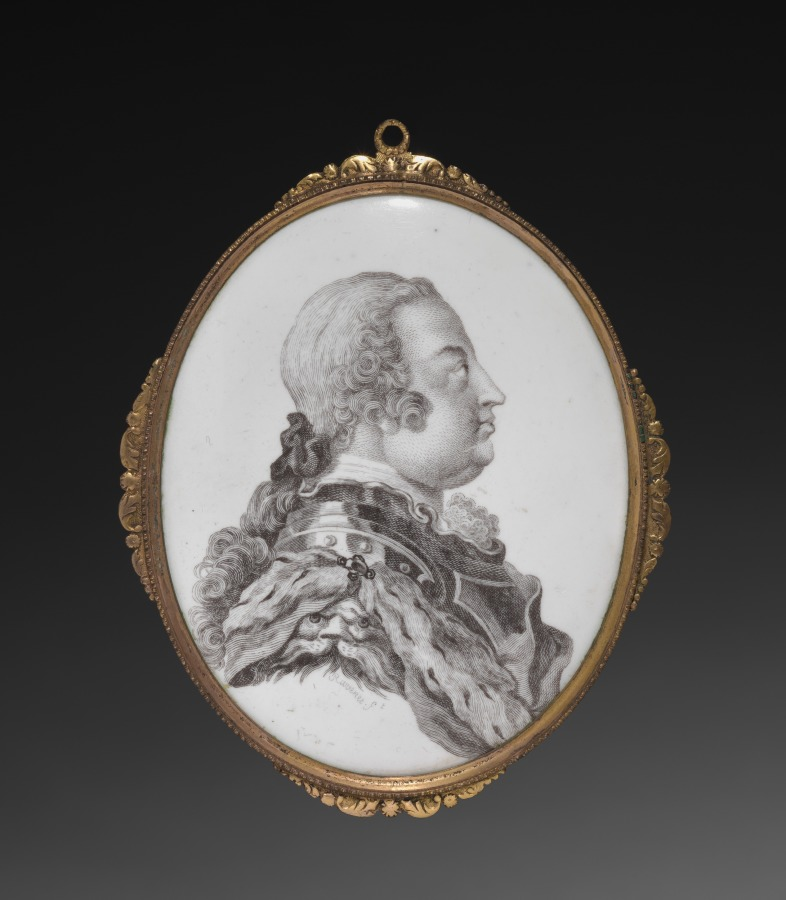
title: Portrait Miniature of Prince William Augustus, Duke of Cumberland (1721-1765)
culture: England, Battersea, 18th century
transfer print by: Simon François Ravenet (French, 1706–1774)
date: c. 1755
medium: enamel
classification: Enamel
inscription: signed beneath shoulder: RaveneT Ft.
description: This portrait miniature depicts Prince William Augustus, the Duke of Cumberland and the youngest son of King George II. During his lifetime, the prince was greatly admired for his role in putting down the Jacobite Rising and defeating Prince Charles at the Battle of Culloden in 1746. Accordingly, he is depicted here in profile wearing a steel breastplate or cuirass, a fur cloak, and armor depicting a lion’s head along his shoulder. These characteristics suggest that the work was inspired by a series of medals produced in the mid-1740s celebrating the history of Great Britain and Ireland.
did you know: The lion head depicted on the prince’s shoulder is a symbol of Great Britain.